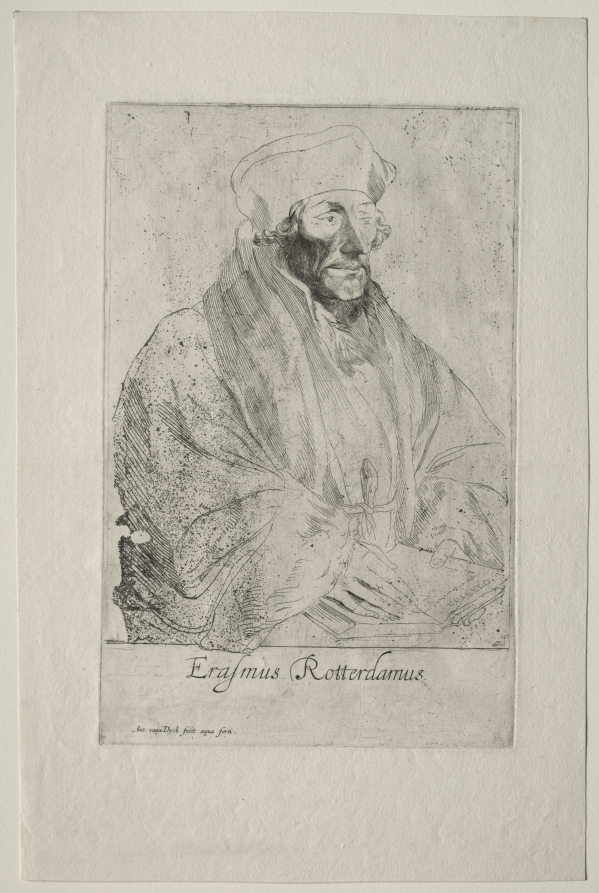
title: Desiderius Erasmus of Rotterdam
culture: Flanders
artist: Anthony van Dyck (Flemish, 1599–1641)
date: 1630–33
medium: etching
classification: Print